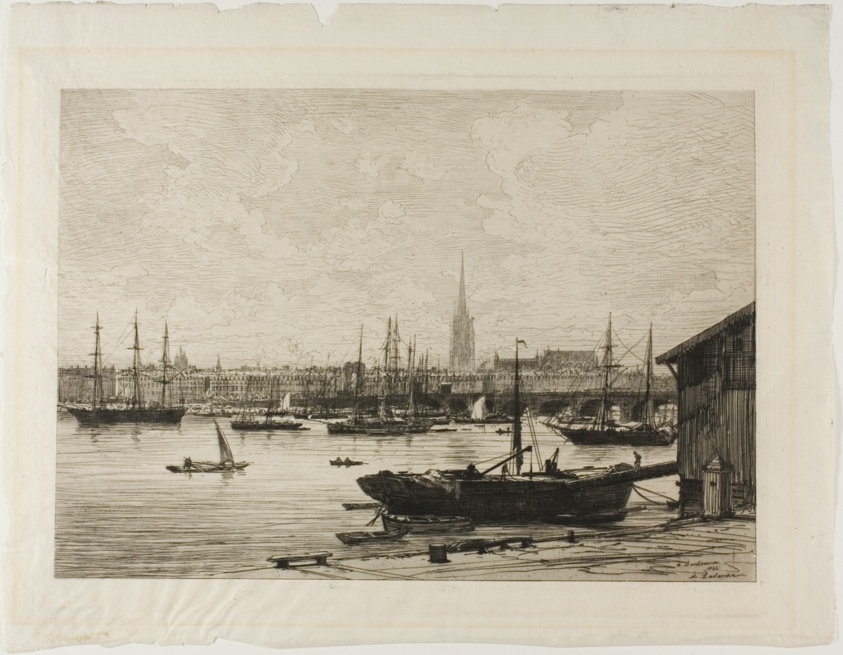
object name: Print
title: View of Bordeaux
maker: Maxime Lalanne (French, 1827-1886)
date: 1866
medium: Etching on ivory laid paper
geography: France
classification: etching; print; prints and drawing